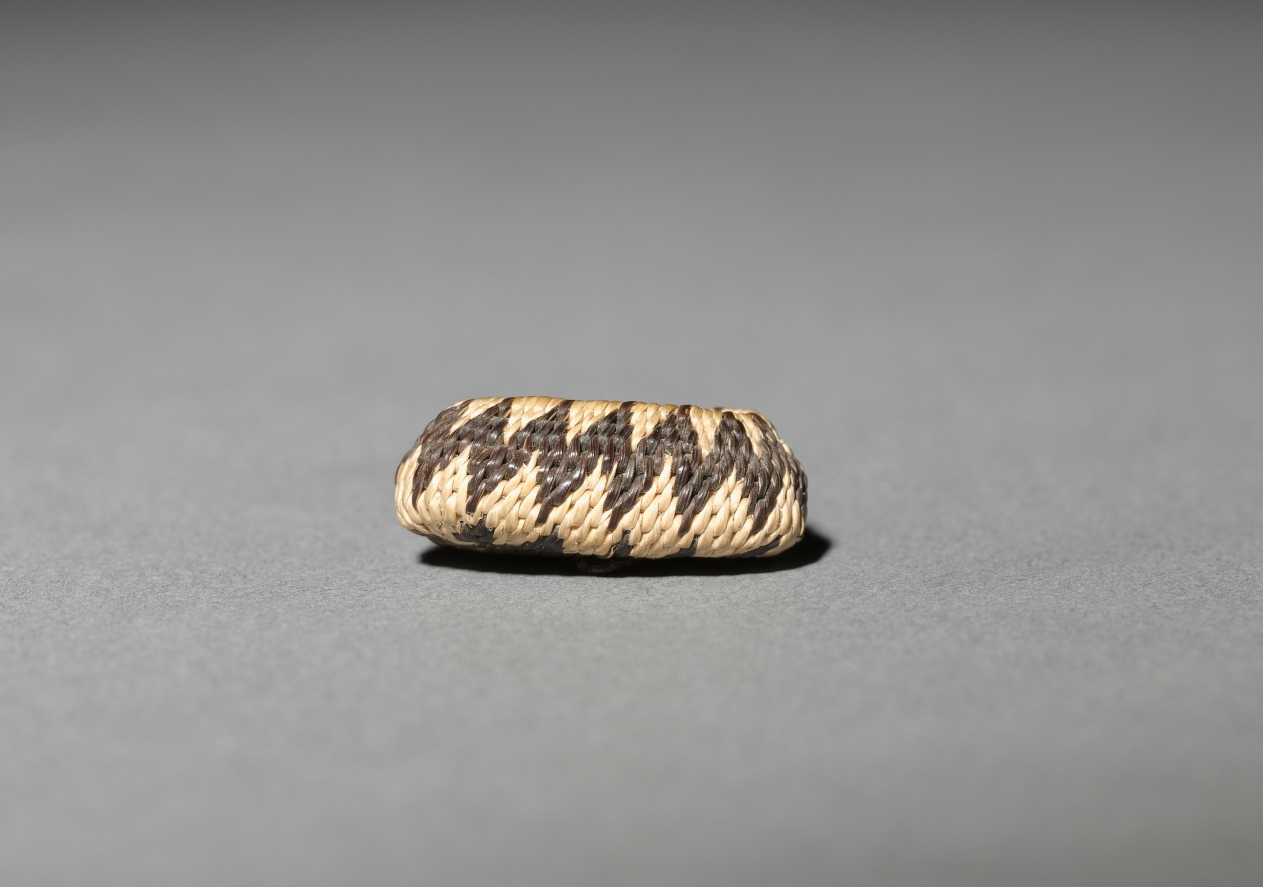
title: Miniature Rhomboidal Basket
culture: California, Pomo, late 19th-early 20th century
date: late 1800s-early 1900s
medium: plant materials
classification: Basketry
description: Miniature baskets were made to demonstrate the basket-maker’s virtuoso skill, and these tiny marvels seem to be no exception—the smallest are just a few millimeters wide but still patterned. For such fine work, dexterity was required as much for preparation of materials as for weaving.